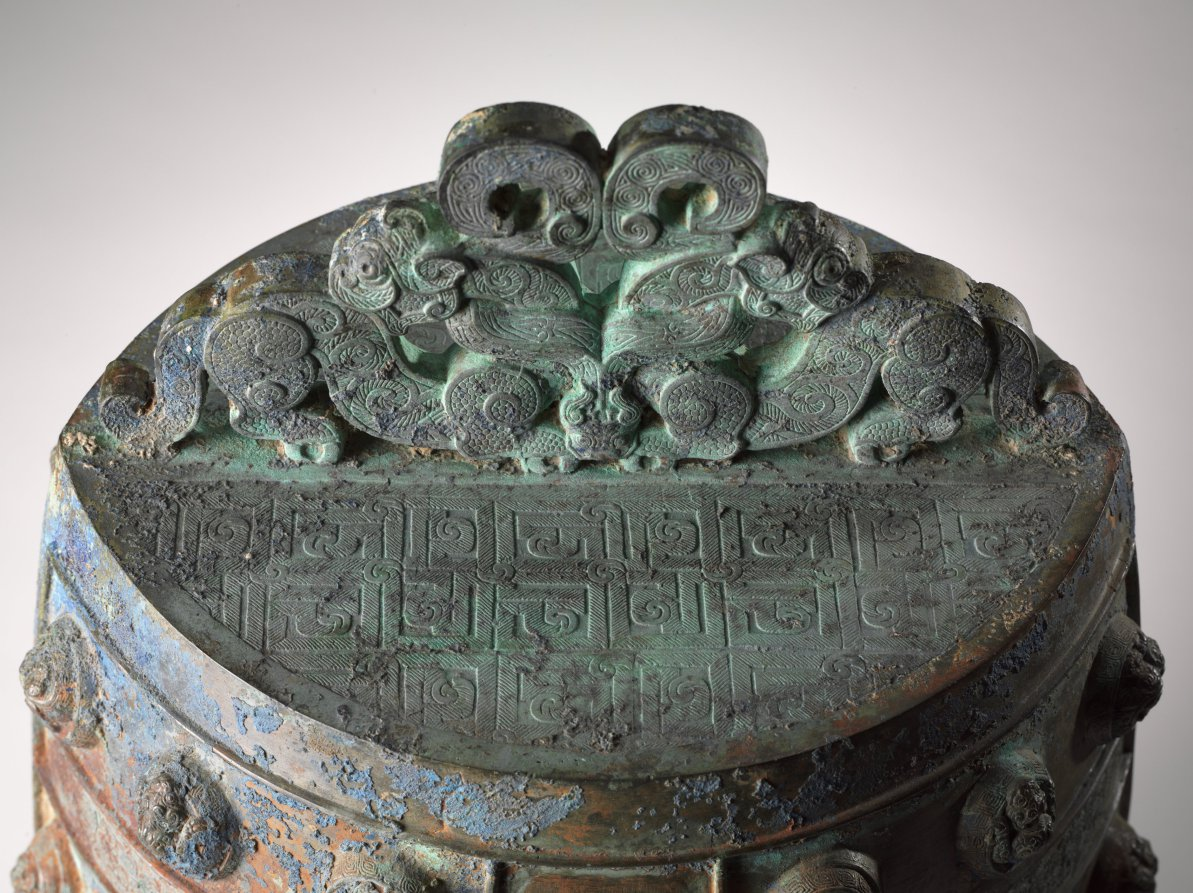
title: Bell (Bo Zhong)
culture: China, Eastern Zhou dynasty (770–256 BCE)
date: early 400s BCE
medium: bronze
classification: Metalwork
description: Music in the Eastern Zhou dynasty not only served ritual purposes but also provided entertainment in feudal courts. The elliptical cross-section of the Chinese bronze bell is unique; it could produce two notes depending on where the bell is struck, either at the rim or near the center. The bell is suspended when played and often belongs to a graduated set arranged according to pitch and size. This bell displays elaborate ornamentation and exquisite workmanship. A twin-bodied serpent intertwined with two tigers forms the suspension loop at the top. Coiled serpents form the knobs on the body. The lower part bears an animal mask, its horns interlaced with abstract bird designs.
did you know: The bell could produce two notes depending on where it is struck.